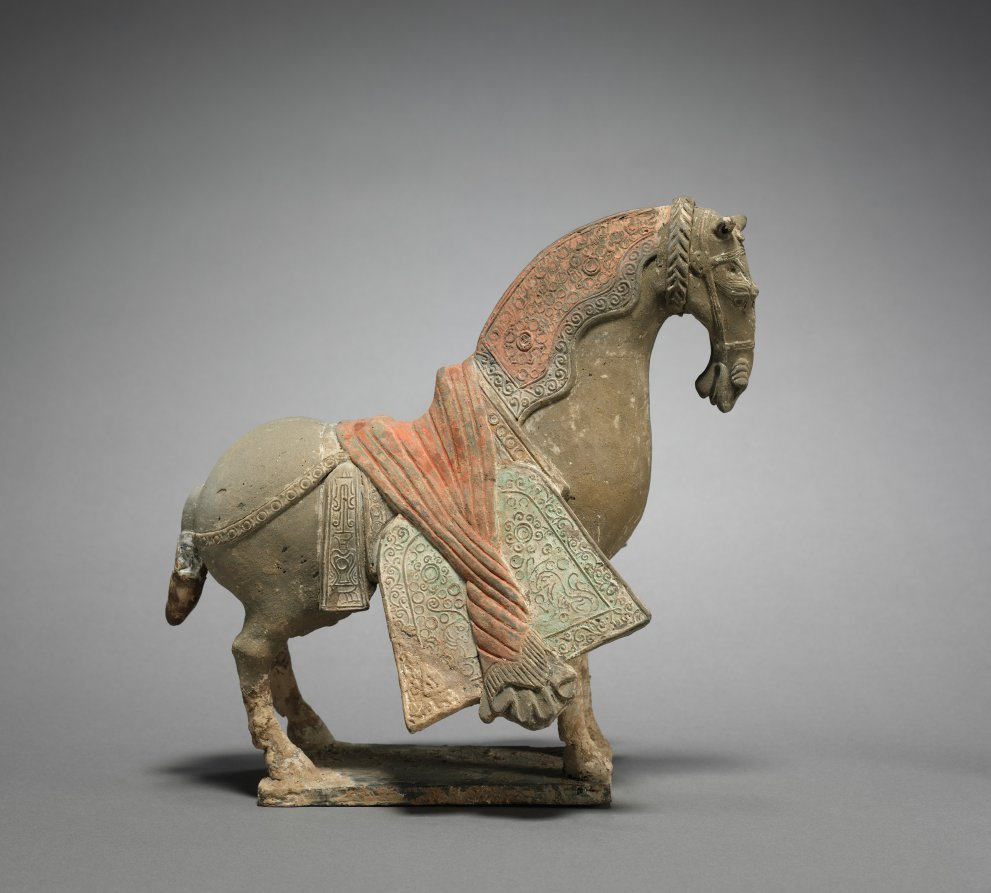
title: Mortuary Horse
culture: China, Six Dynasties period (317-581), Northern Wei dynasty (386-534)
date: c. 525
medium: dark buff earthenware with polychrome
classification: Sculpture